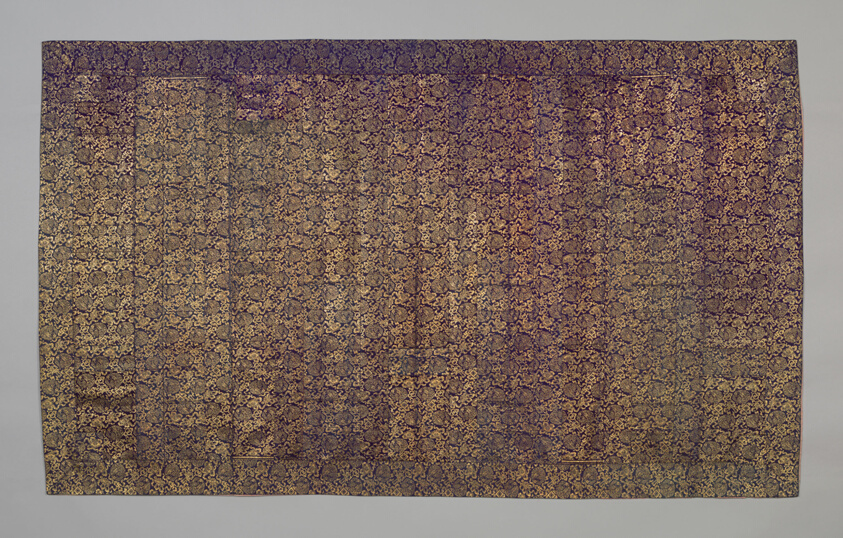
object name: Textile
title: Kesa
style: edo (japanese period)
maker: Japan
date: late Edo period (1789–1868), early 19th century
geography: Japan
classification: textile; costume; weaving; liturgical - buddhist